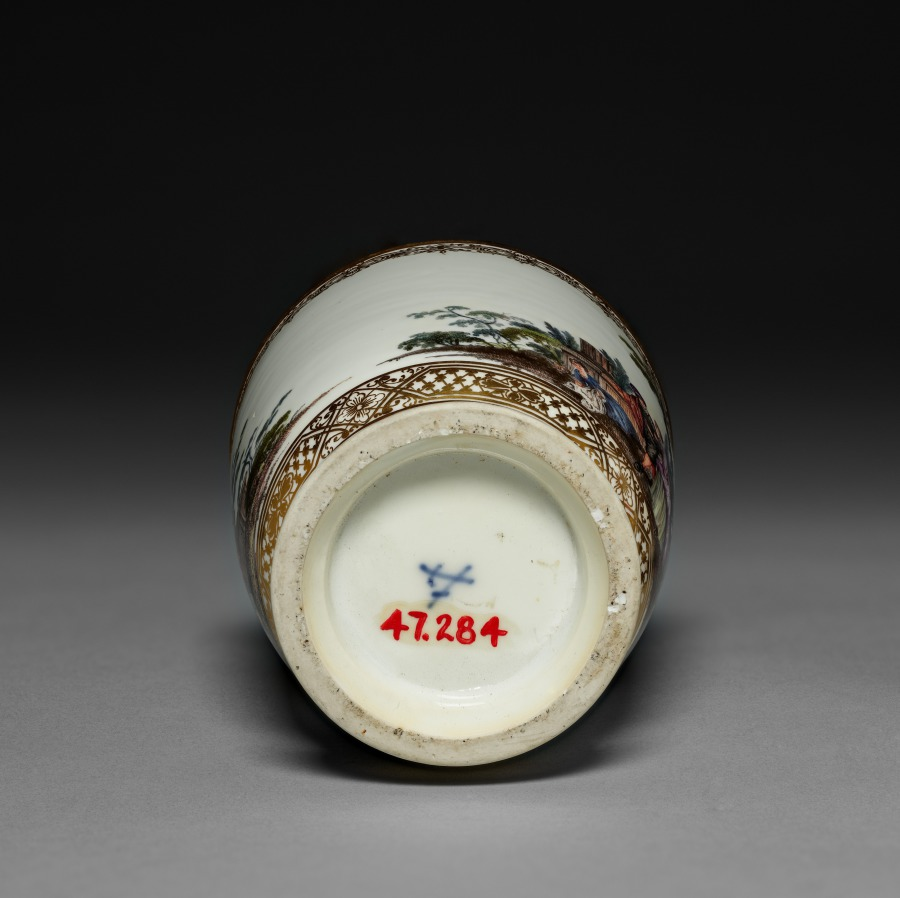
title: Beaker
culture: Germany, Meissen, 18th century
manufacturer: Meissen Porcelain Factory (German, est. c. 1710)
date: c. 1745–1750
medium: porcelain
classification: Ceramic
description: In an effort to rejuvenate its style of decoration, the Meissen factory acquired a large group of French engravings about 1740. During the next decade, figural decorations in the style of Antoine Watteau and his followers became a typical mode of decoration on Meissen pporcelain.